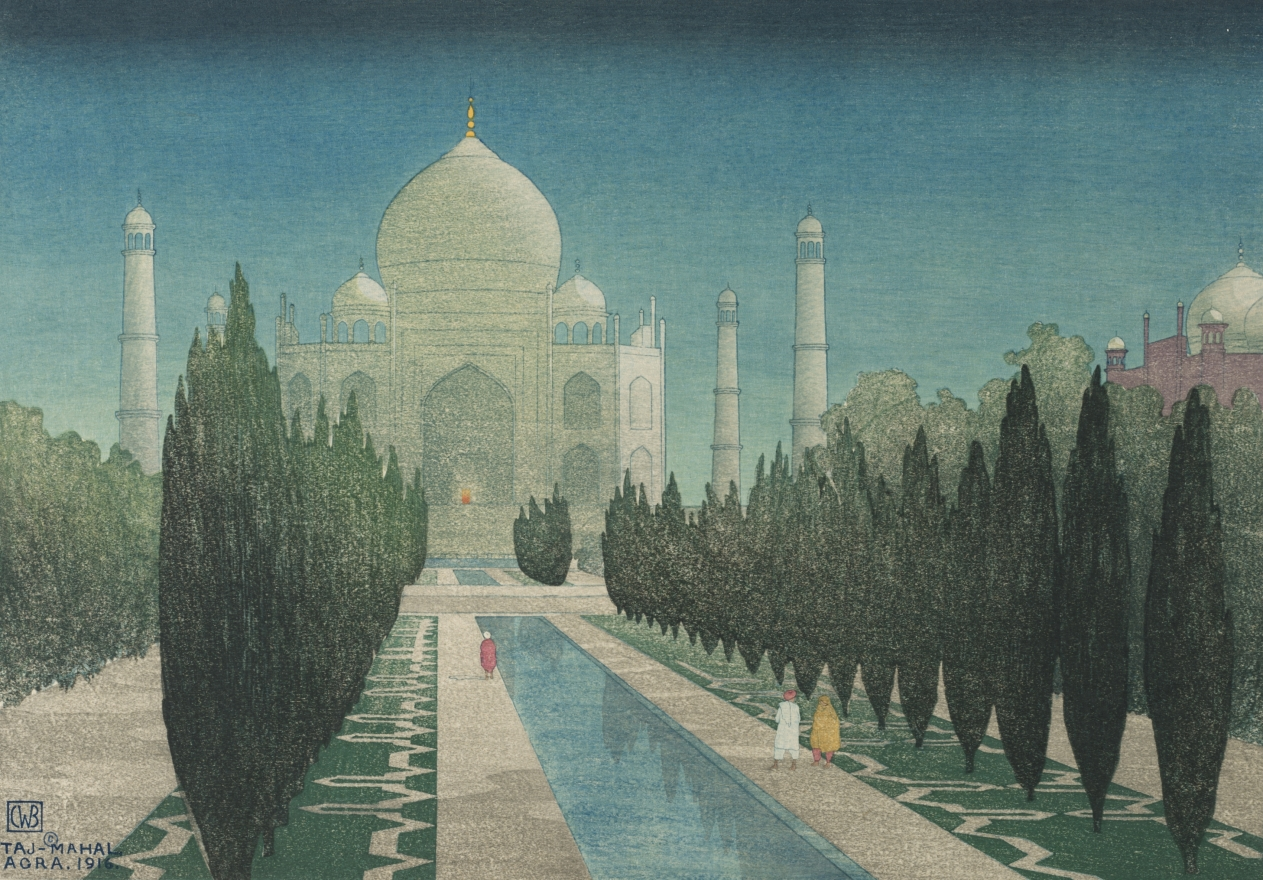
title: Taj Mahal, Agra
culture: England, 20th century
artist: Charles William Bartlett (British, 1860–1940)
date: 1916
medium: color woodcut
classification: Print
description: Today, anyone with internet access can virtually walk through the Taj Mahal with the aid of tools like Google Maps. During the early 20th century, when England still ruled India, this landmark was less accessible to the rest of the world. People in other parts of the world had to rely on stories and images made by travelers who helped perpetuate a romantic vision of its beauty.